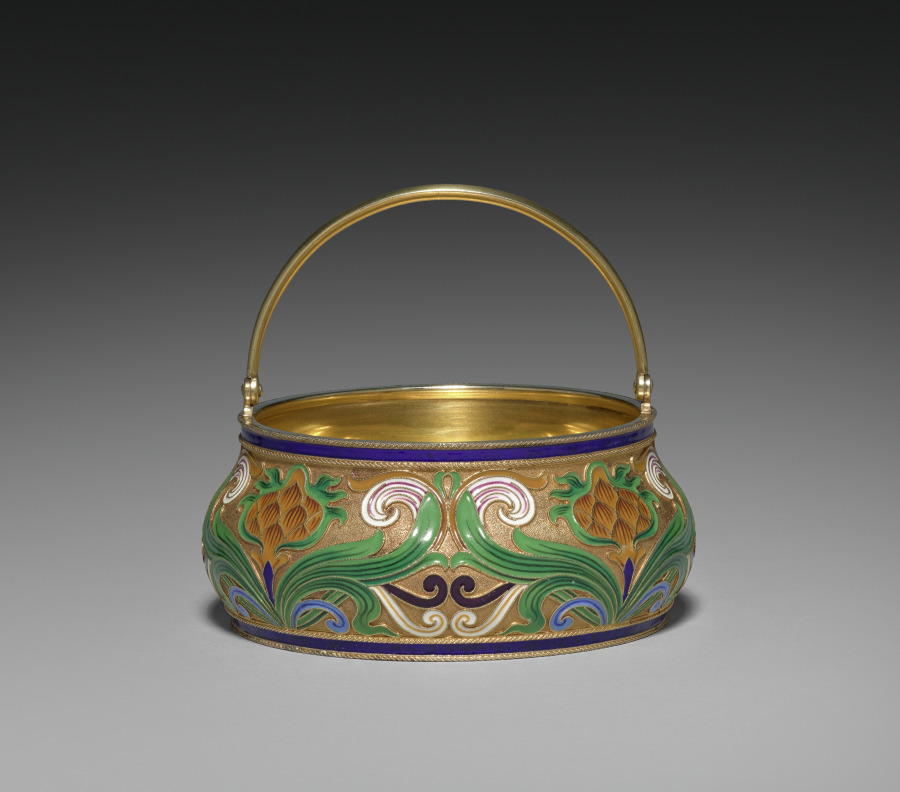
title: Jam (Varenye) Basket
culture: Russia, St. Petersburg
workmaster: attributed to Feodor Ivanovich Rückert (Russian, 1840–1917)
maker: House of Fabergé (Russian, 1842–1918)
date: 1887–96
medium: silver gilt, opaque cloisonné enamel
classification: Miscellaneous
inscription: 84, St. George [assay mark for Moscow, 1882-1896]; C. Fabergé (in Cyrillic); double-headed eagle [imperial warrant]; 10593 scratched.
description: A particularly Russian component of this tea service is this little basket, meant to hold fruit preserved in a sweet juice, called varenye. At Russian tea, varenye was strained and served over cakes or biscuits in a similar way that the English take jam with scones at high tea.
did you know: This jam (varenye) basket is part of a larger tea set.